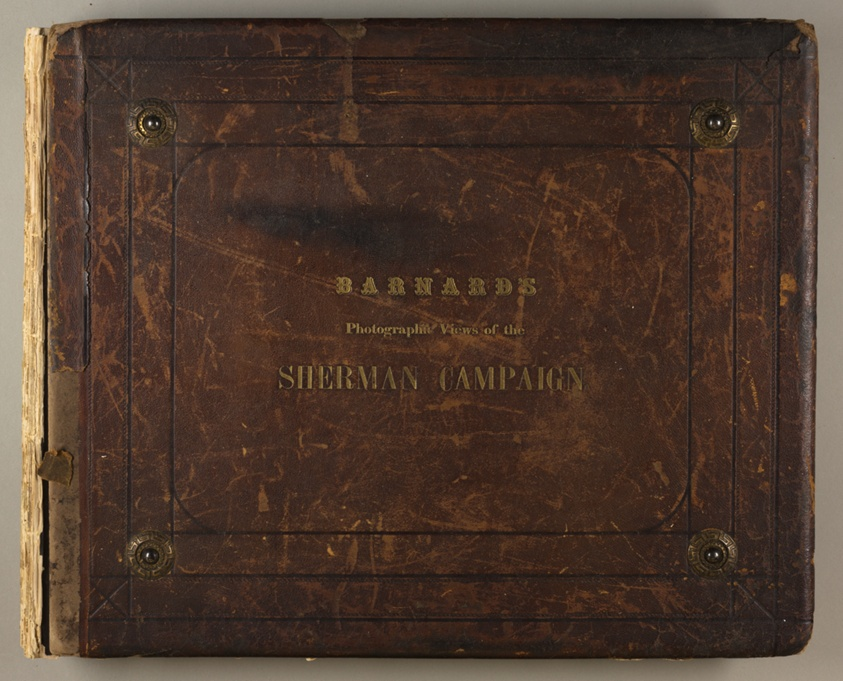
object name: Photograph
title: Photographic Views of Sherman's Campaign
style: 19th century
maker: George N. Barnard (American, 1819–1902)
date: 1866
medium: Albumen prints (61)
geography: United States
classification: photograph; albumen silver print; photography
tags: Collected by Hugh Edwards, Sherman's Campaign 1866